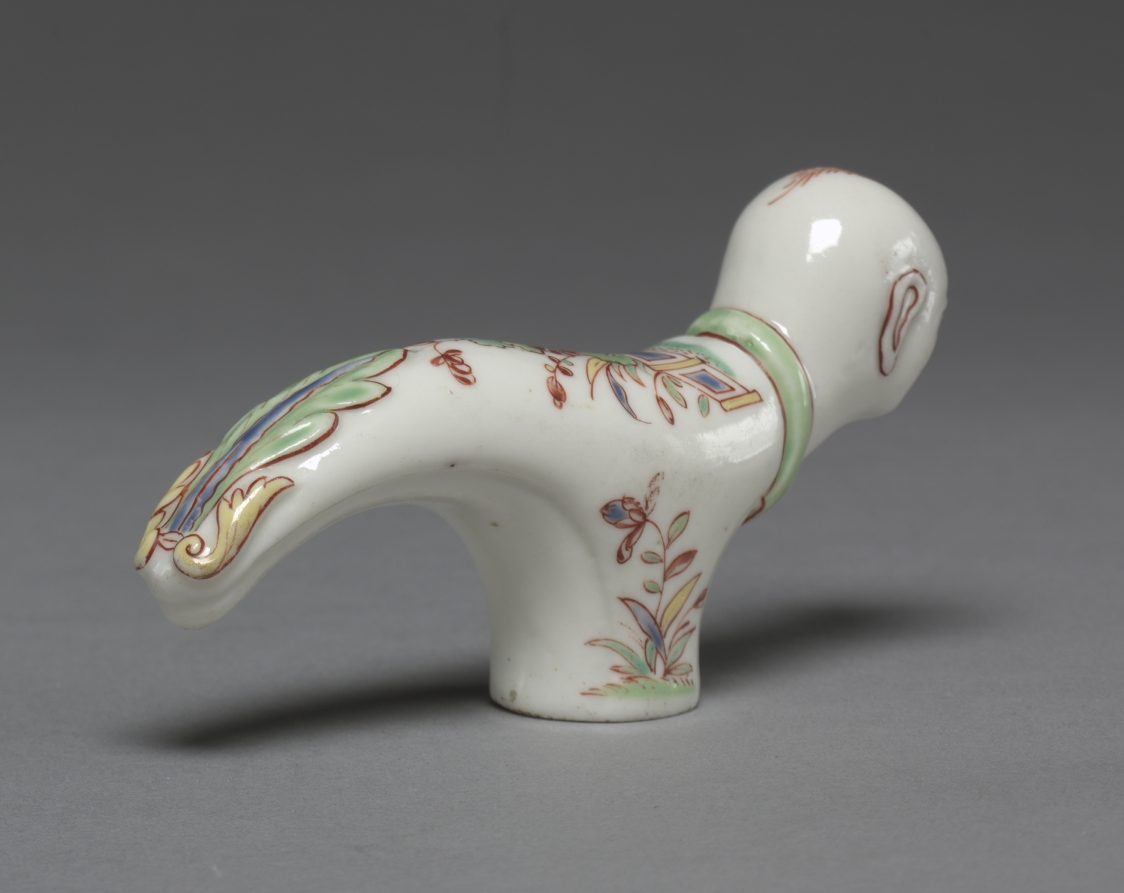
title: Cane Handle (Poignée de canne)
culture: France, Saint Cloud, 18th century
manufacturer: Saint Cloud Porcelain Factory (French)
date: c. 1745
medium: soft-paste porcelain with enamel decoration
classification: Ceramic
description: During the first half of the 18th century, porcelain cane handles were widely produced by the Saint-Cloud porcelain factory. This cane handle, molded in the shape of the head and torso of an Asian man, is representative of the popularity of chinoiserie, European designs that attempted to imitate the art, culture, and techniques of China and Japan.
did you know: The colorful overglaze enamel that decorates this cane handle was typical of Japanese Kakiemon decoration.